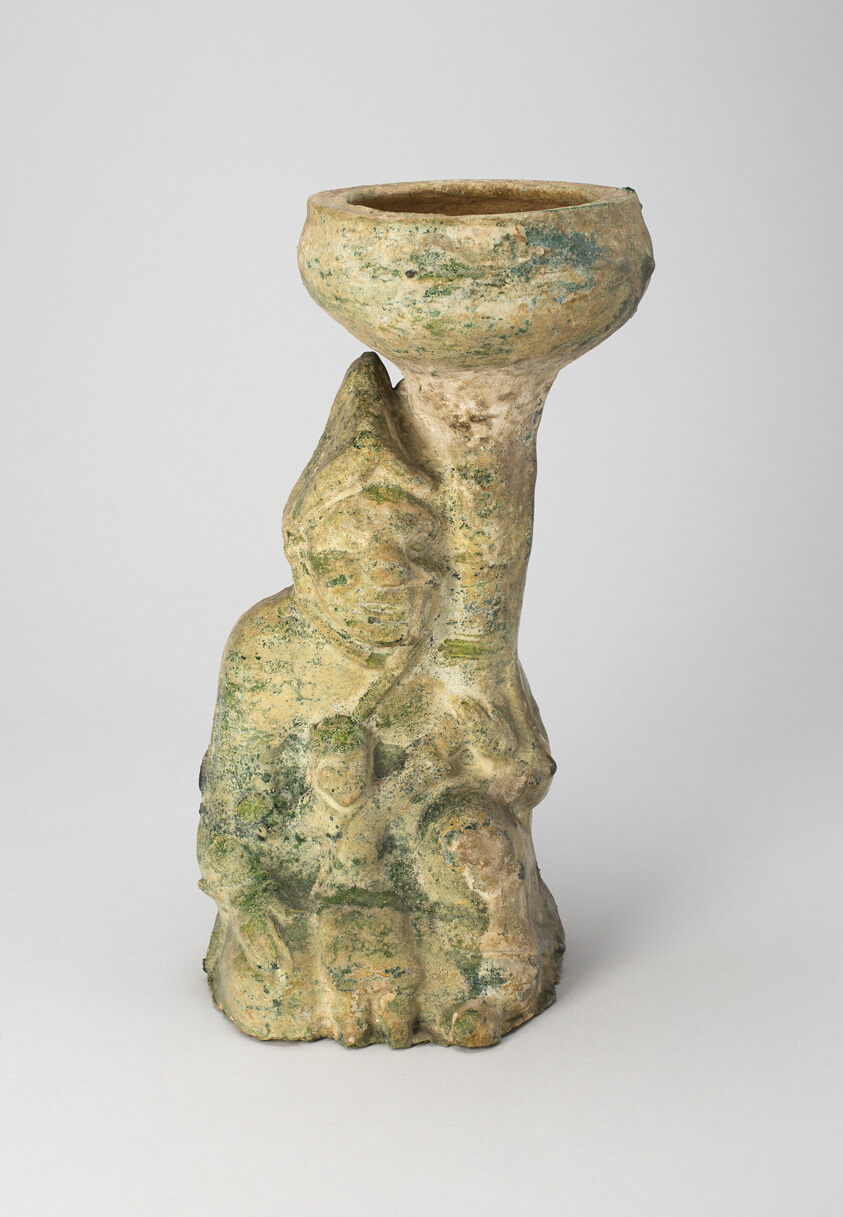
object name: Sculpture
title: Lamp with Human Form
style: Chinese (culture or style)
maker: China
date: Eastern Han dynasty, 25–220 CE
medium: Earthenware with lead glaze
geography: China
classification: earthenware; ceramics; sculpture; asian art